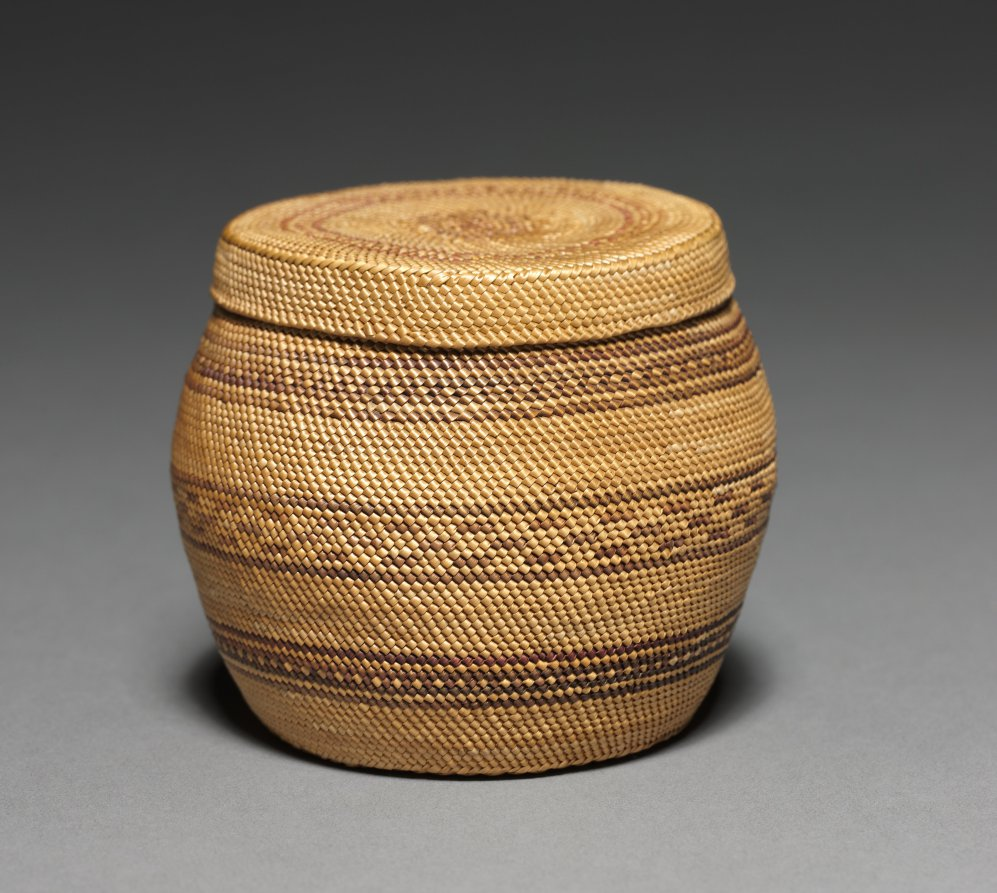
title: Covered Bowl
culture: Northwest Coast, Vancouver Island, late 19th century (?)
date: c. 1875–1900?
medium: twined grass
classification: Basketry